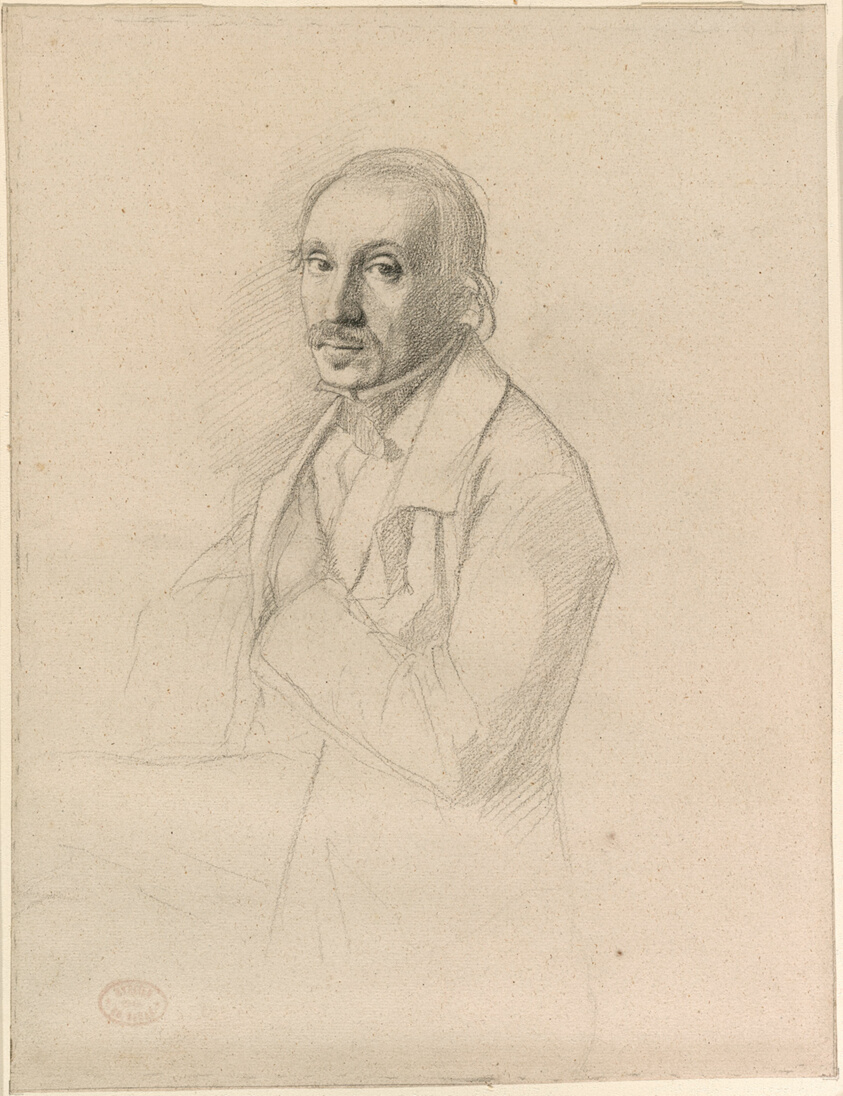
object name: Drawing and Watercolor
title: Auguste Degas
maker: Edgar Degas; French, 1834–1917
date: c. 1859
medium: Graphite, with touches of stumping, on buff laid paper with red and brown inclusions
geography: France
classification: prints and drawing; graphite; drawings (visual works); paper